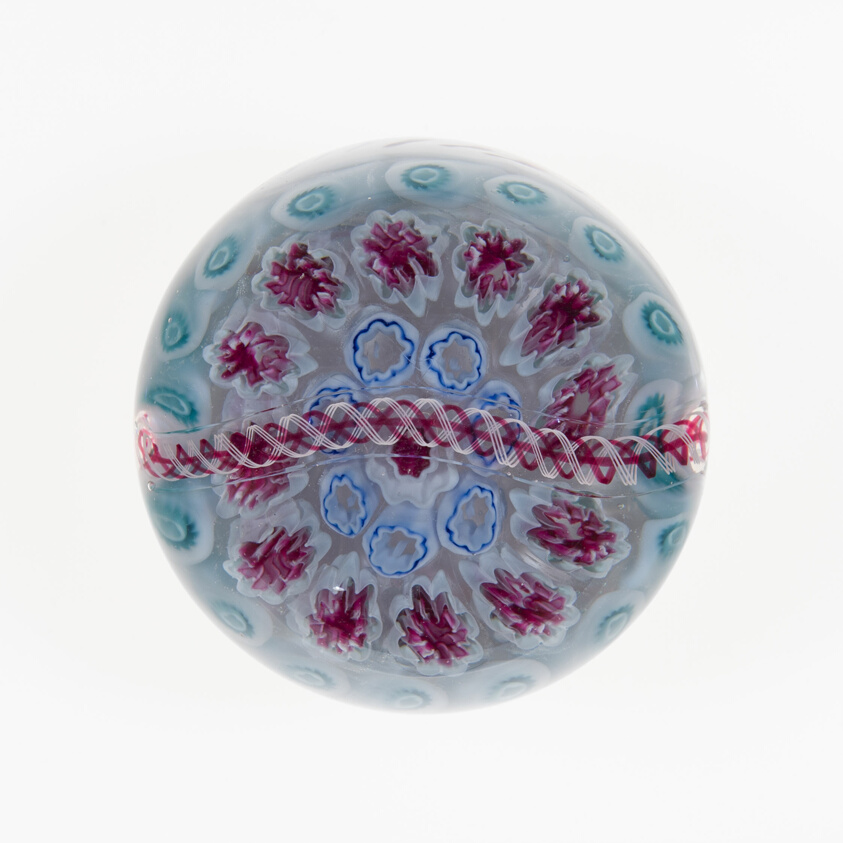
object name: Glass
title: Paperweight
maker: George Bacchus and Sons; Birmingham, England, c. 1817-1882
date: c. 1845–60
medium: Glass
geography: France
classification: paperweight; glass